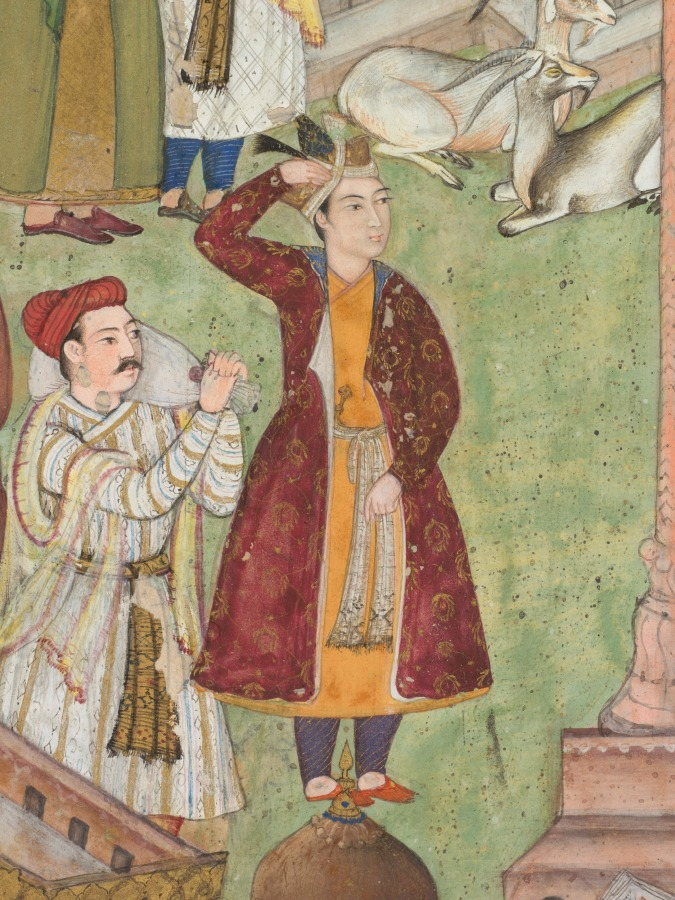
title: Babur receives booty and Humayun’s salute after the victory over Sultan Ibrahim in 1526, from an Akbar-nama (Book of Akbar) of Abu’l Fazl (Indian, 1551–1602)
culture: Mughal India, court of Akbar (reigned 1556–1605)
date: c. 1596–1597 or 1604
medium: Gum tempera and gold on paper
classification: Painting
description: The first Mughal emperor Babur sits enthroned as men bring gifts and sacks of tribute to mark a successful expansion of his territories. Emblematic of his role in leading the victory, his son Humayun wears a wine-and-gold robe of honor despite the Delhi heat in late April. Marking the royal space are a carpet and canopy painted with a lapis lazuli ground. The floral vine motif called arabesque swirls around a central lobed medallion. These delicate patterns are inspired from Persian manuscript illuminations. Contemporary historians describe awnings of gold embroidery, brocade, and velvet along with colorful carpets resembling a beautiful flower bed.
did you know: A clerk records the amount of tribute that Babur received from conquered kings.